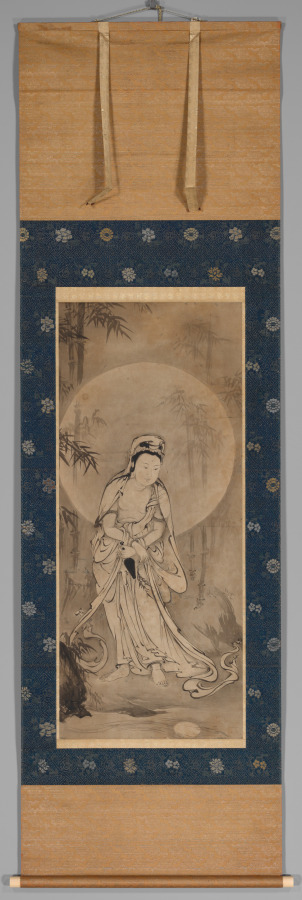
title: Willow-and-Moon Kannon (Yōryū Kannon)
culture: Japan, Muromachi period (1392–1573)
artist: attributed to Gakuō Zōkyū (Japanese, active about 1482–1514)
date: c. 1500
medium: Hanging scroll; ink on paper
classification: Painting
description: This painting of Kannon, a Buddhist deity of mercy and compassion with many forms. is attributed to Gakuō Zōkyū, a well-known Zen monk who specialized in ink painting. Kannon looks at the moon reflected in the water, a symbol of impermanence, and holds a willow branch and water vase symbolizing healing and purification.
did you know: Kannon is a bodhisattva—a being capable of enlightenment, but who delays it in order to help other beings.